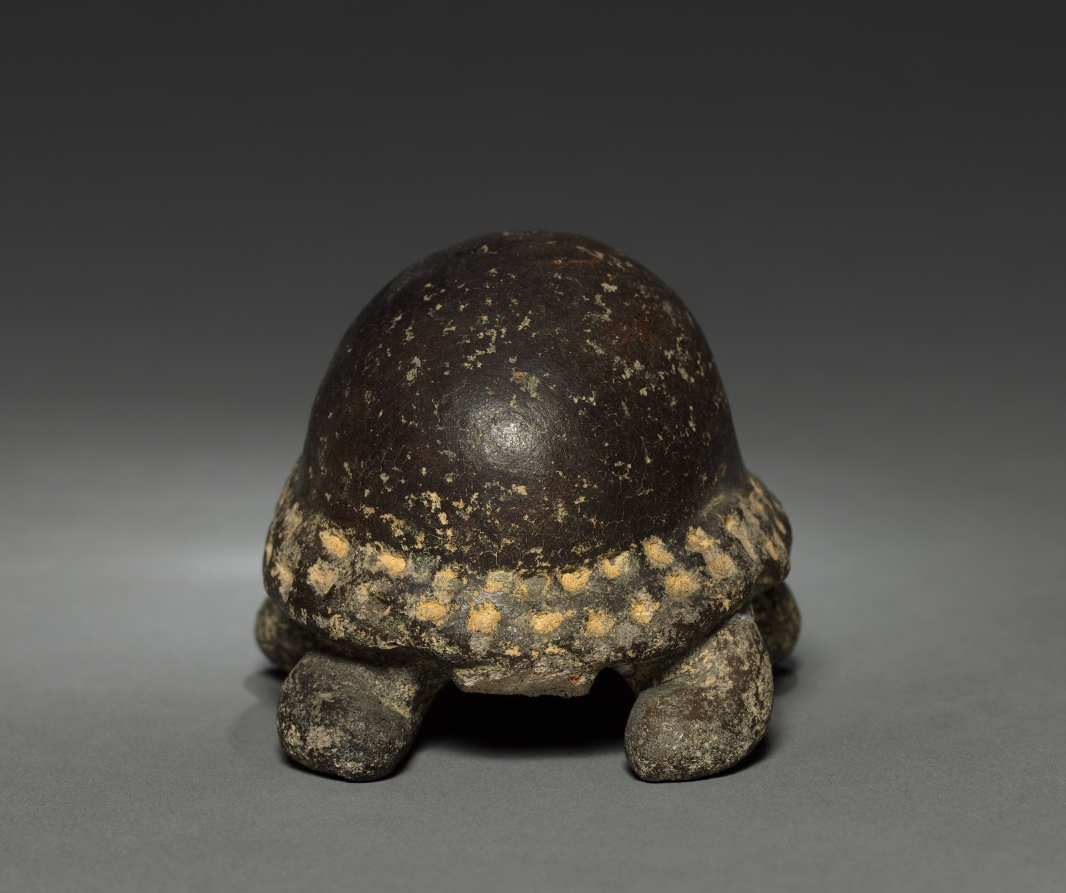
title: Turtle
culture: Colombia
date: before 1921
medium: pottery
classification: Ceramic